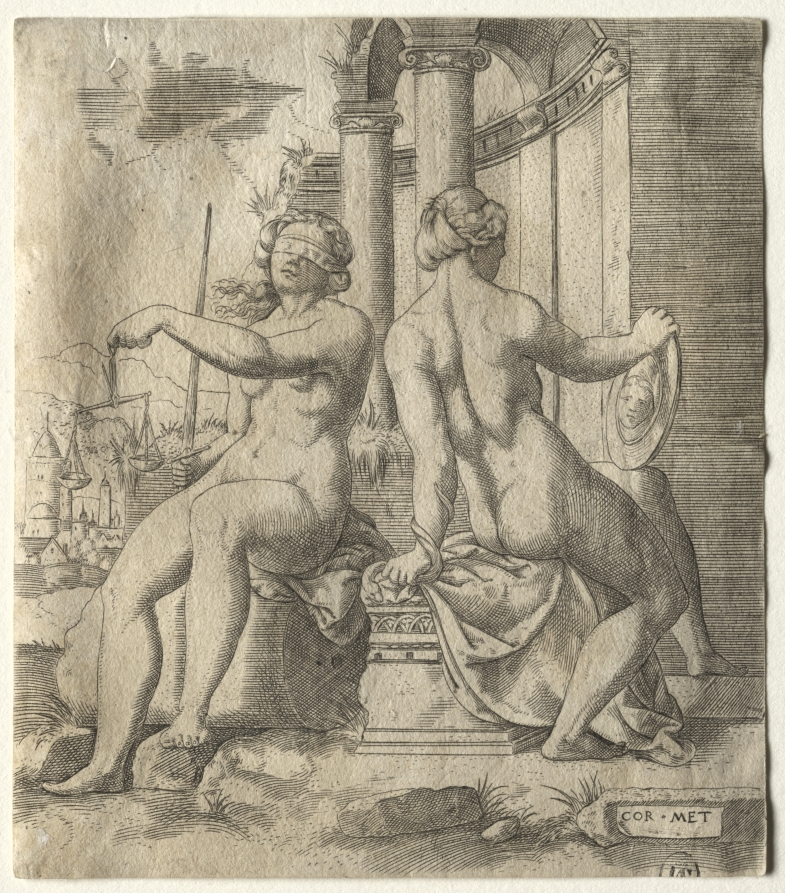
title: Justice and Prudence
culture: Flanders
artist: Cornelis Massys (Flemish, 1510/11–1556/57)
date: 1538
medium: engraving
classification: Print